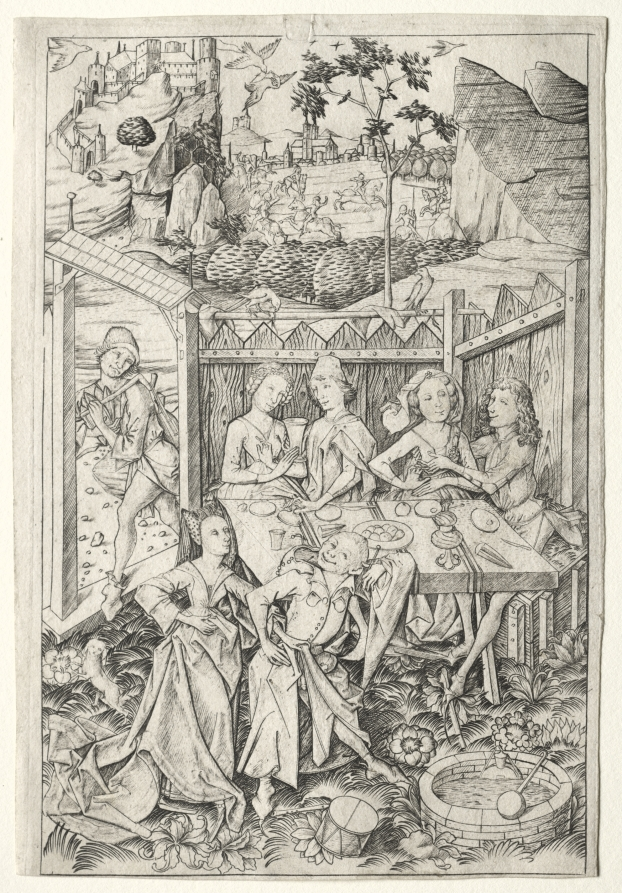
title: The Garden of Love (Large Plate)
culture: Germany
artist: Master ES (German, active 1450–67)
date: c. 1465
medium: engraving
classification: Print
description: Master ES’s action-packed scene presents a love garden before a landscape with knights playing jousting games. Love gardens were locales for displaying chaste love, but the behavior here, such as touching and wine drinking between couples at the table, indicates that their love is rather more physical. A traveling poet at the door brings musical enticements, and a man with a fool’s cap in the foreground signifies lust. The many birds throughout the scene refer to coupling, since “birding” was a euphemism for the sex act.